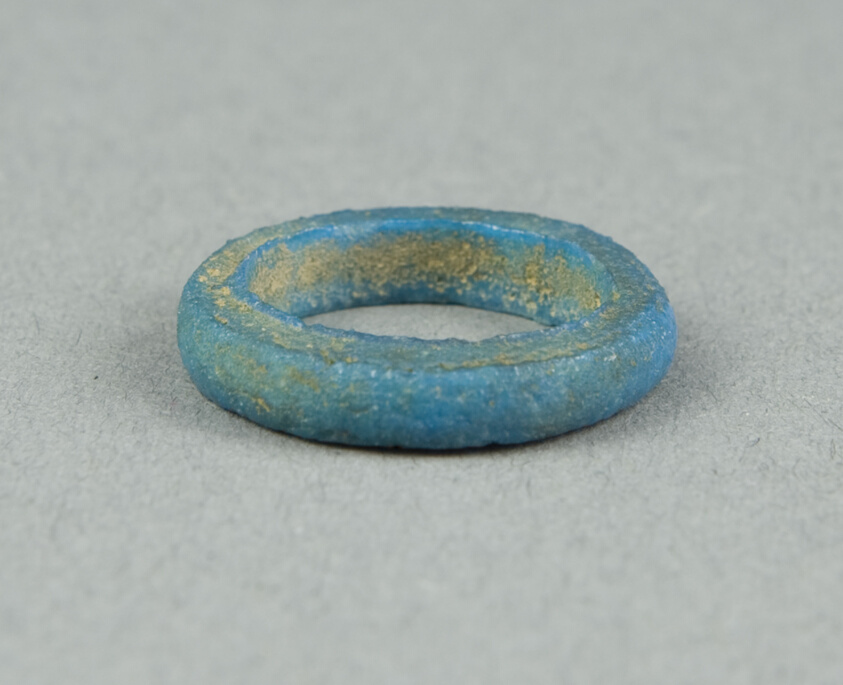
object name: Costume and Accessories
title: Ring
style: egyptian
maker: Egyptian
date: New Kingdom, Dynasties 18–20 (about 1350–1069 BCE)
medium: Faience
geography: Egypt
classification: ring (jewelry); ceramics; jewelry; ancient art; costume; faïence (composite material)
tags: circles